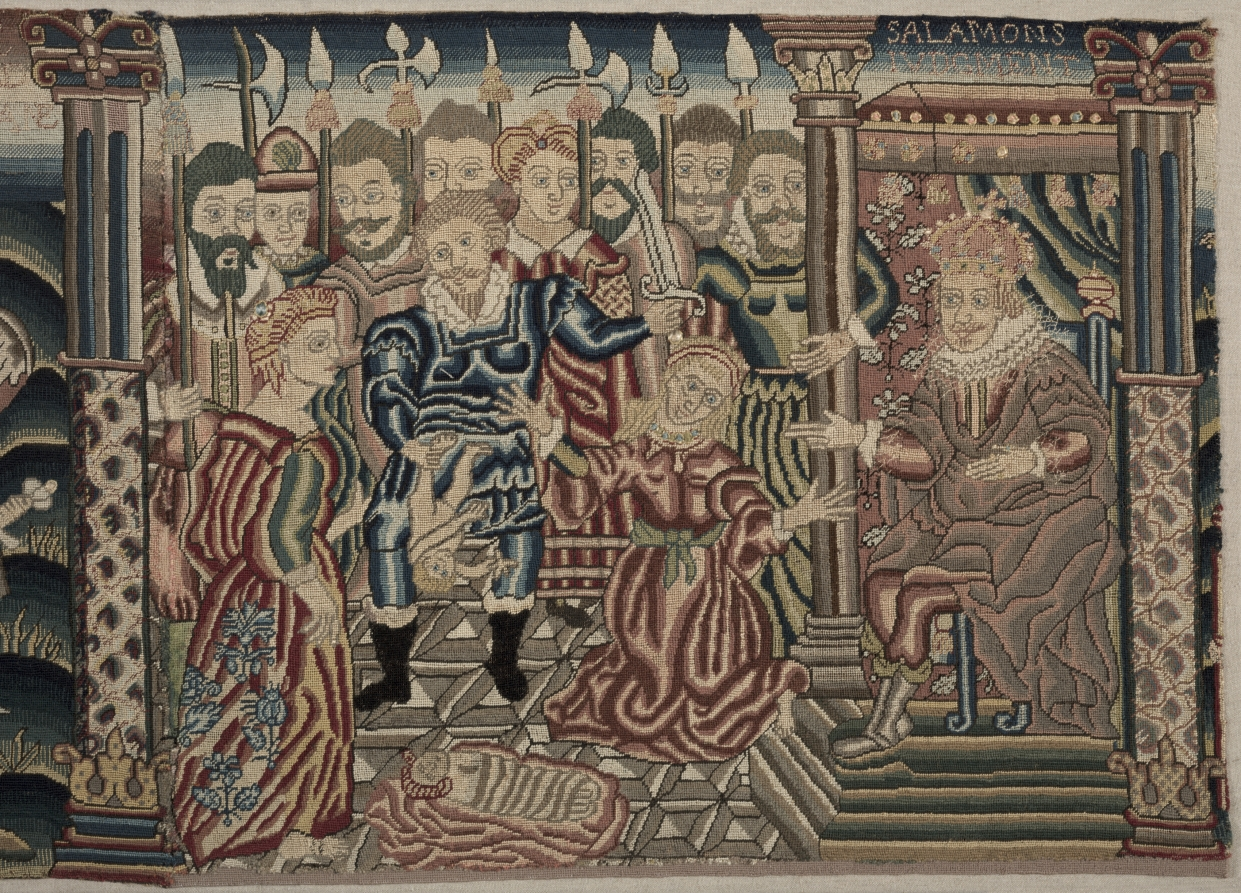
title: Section of an Embroidered Frieze: Rebecca Meeting Isaac, Abigail Meeting David with a Present, The Judgment of Solomon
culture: England, Period of Charles I (1625-1649), 17th century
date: 1625–1649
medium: petit-point embroidery; wool and silk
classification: Embroidery